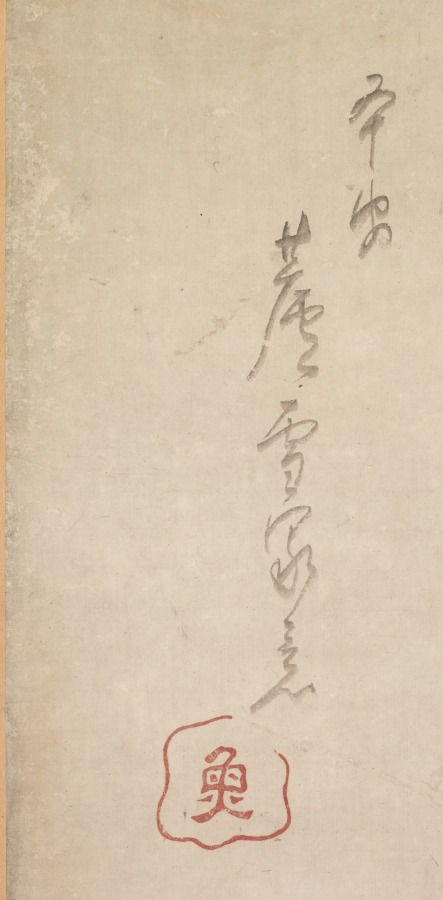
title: Puppies, Sparrows, and Chrysanthemums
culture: Japan, Edo period (1615–1868)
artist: Nagasawa Rosetsu (Japanese, 1754–1799)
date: c. 1792–94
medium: Fusuma panel remounted as a hanging scroll; ink and slight color on paper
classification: Painting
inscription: Signature and seal of artist upper left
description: These paintings were originally mounted as sliding doors (fusuma) used inside a building. The circular areas on the paintings’ paper surfaces are traces of the former positions of the door pulls (hikite). A flock of sparrows gathers on a trellis supporting flowering chrysanthemum. Below is a litter of puppies, some cavorting, others napping. The tender story created by the curious puppy peering up and tilting its head to listen to the bird’s insistent call in the leftmost part of the composition is characteristic of Nagasawa Rosetsu’s paintings, which often use animals to illustrate the human condition.